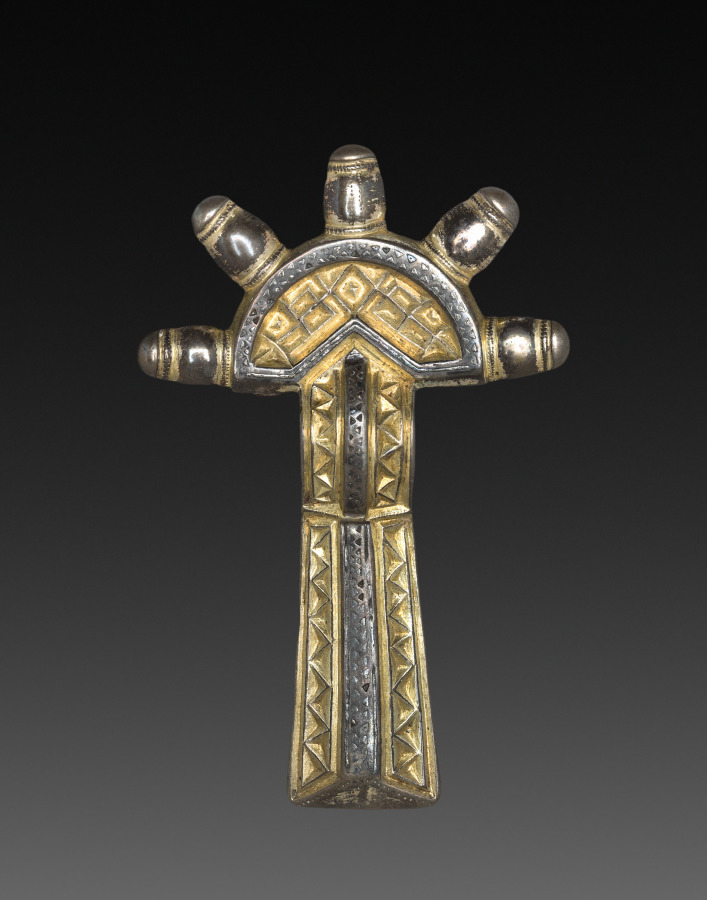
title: Bow Fibula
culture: Alemannic, 6th century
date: 500–550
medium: silver gilt and niello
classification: Jewelry